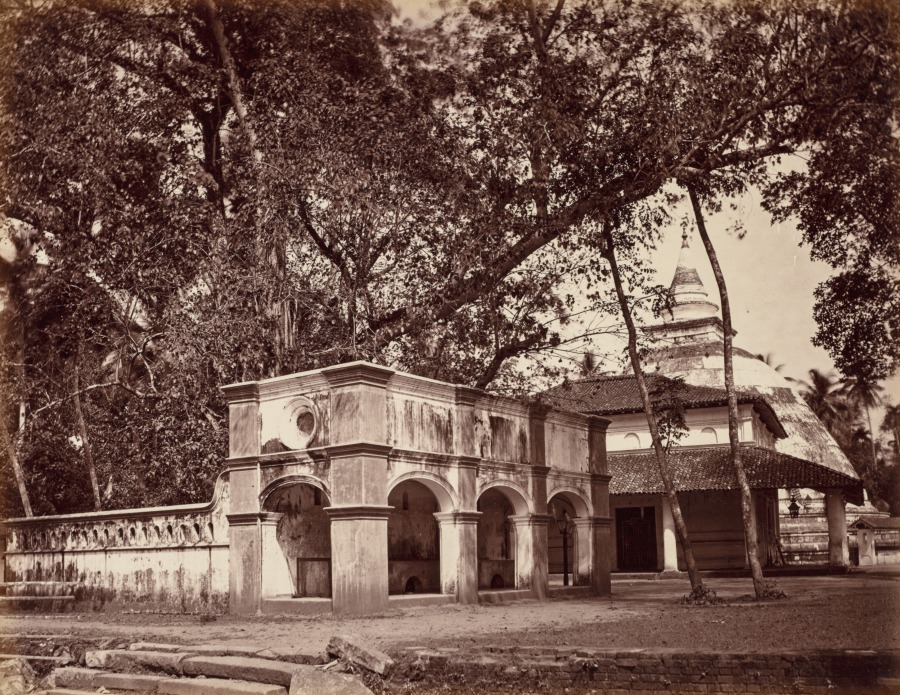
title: Buddhist Temple, Kalani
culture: Sri Lanka, Kandy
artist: Scowen & Co. (British, active Ceylon, 1876–1895)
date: c. 1880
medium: Albumen print from glass plate negative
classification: Photograph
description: This image may actually show the Jaya Sri Maha Bodhi, a sacred fig tree planted in 288 BC in Mahamewna Gardens, Anuradhapura, Ceylon (now Sri Lanka). Grown from a cutting of the tree in India under which Buddha attained enlightenment, it is one of the most sacred Buddhist relics in Sri Lanka.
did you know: Next to the tree are the buildings of a monastery and a whitewashed, dome-shaped structure with pointed spire, called a stupa.